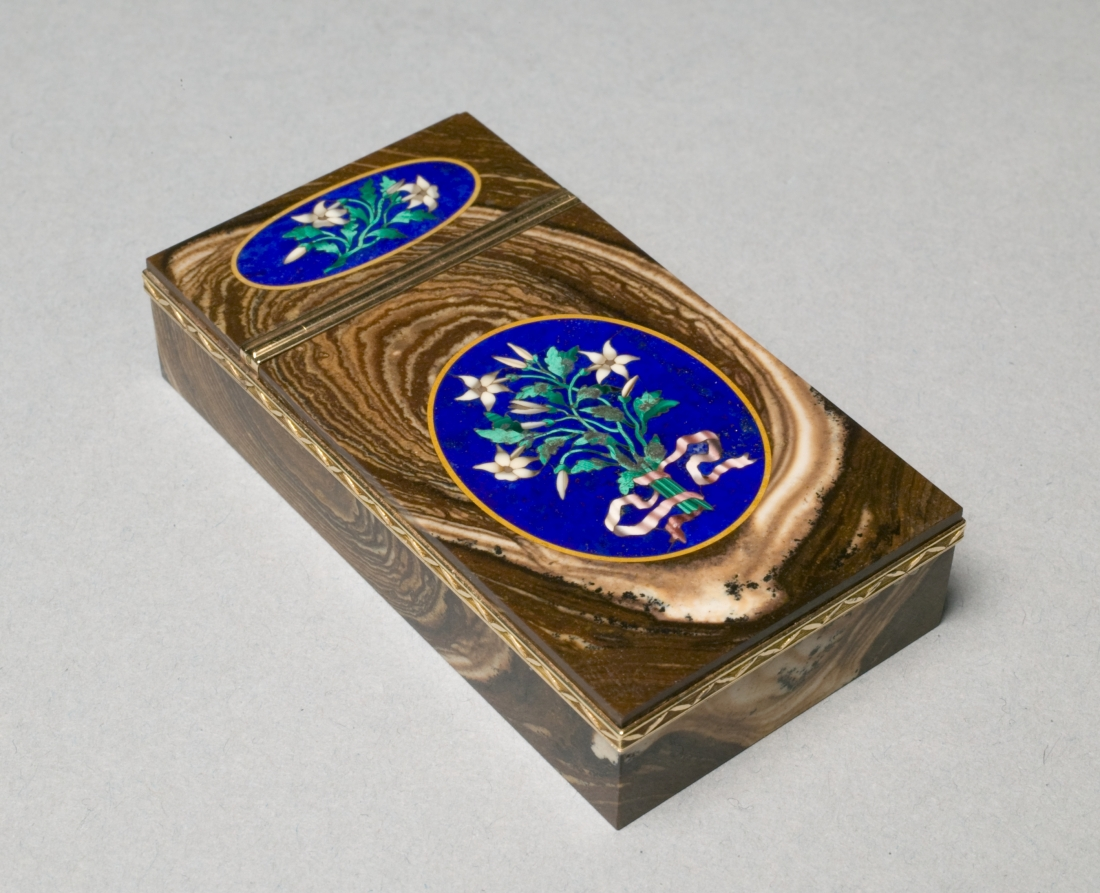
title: Snuff Box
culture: France, early 19th century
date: c. 1840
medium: gold, agate, set with mosaic panels, lapis ground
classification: Miscellaneous